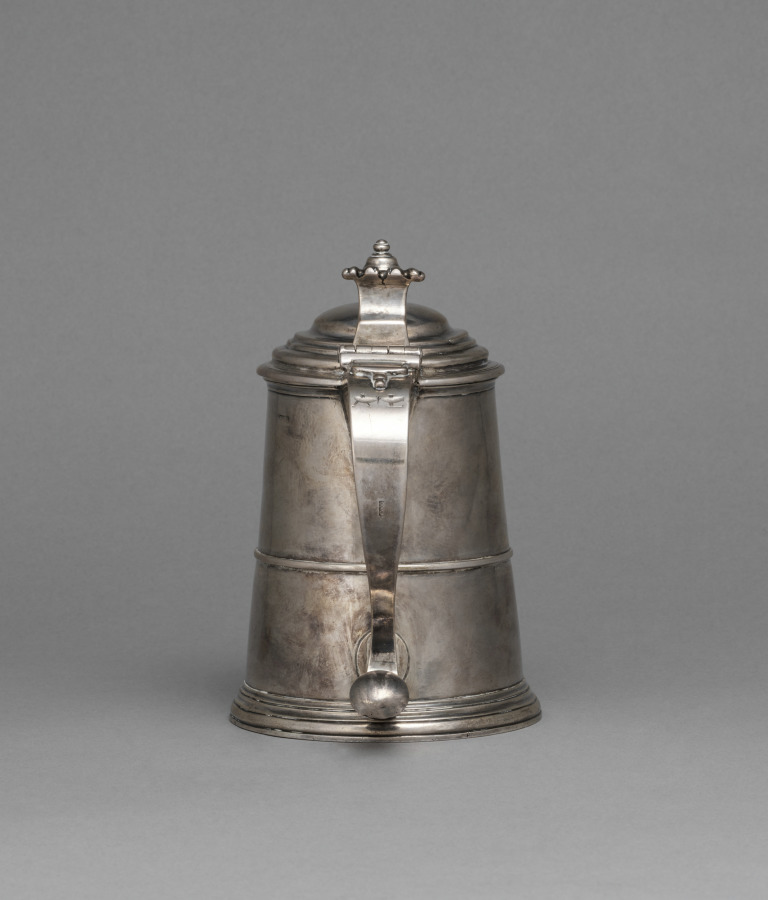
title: Tankard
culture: America, Massachusetts, Plymouth, 18th century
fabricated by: Ephraim Cobb (American, 1708–1775/77)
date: c. 1730–1740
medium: silver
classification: Silver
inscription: engraved "A * L" in block letters on top of handle, and "Anna Leonard" on bottom.